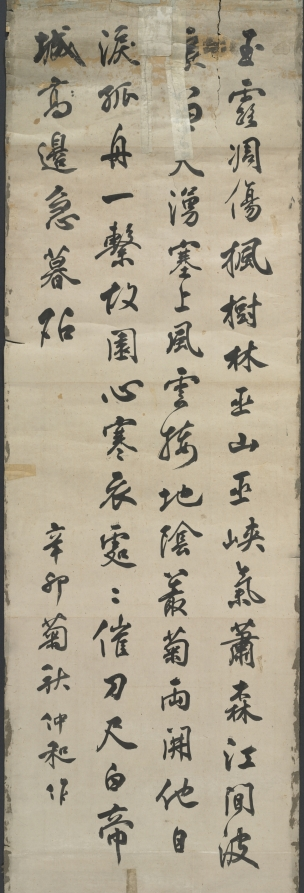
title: Wild Geese and Reeds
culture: Korea, Joseon dynasty (1392–1910)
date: 1392–1910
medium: Unmounted hanging scroll; ink on paper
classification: Painting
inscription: Artist's inscription with two seals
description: In this hanging scroll, wild geese are portrayed engaging in different activities: descending to a marsh, gathering in flocks, and grazing on plants. In Korean paintings, images of geese and reeds serve as the symbol of peaceful senior life; a homophone of geese and reeds means aging peacefully.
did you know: Paintings that depict a peaceful image of migratory white-fronted geese descending to a river bank where tall reeds gently bend in the evening breeze were widely favored as birthday gifts, especially to elders: a homophone of the title Geese and Reeds means Aging Peacefully.